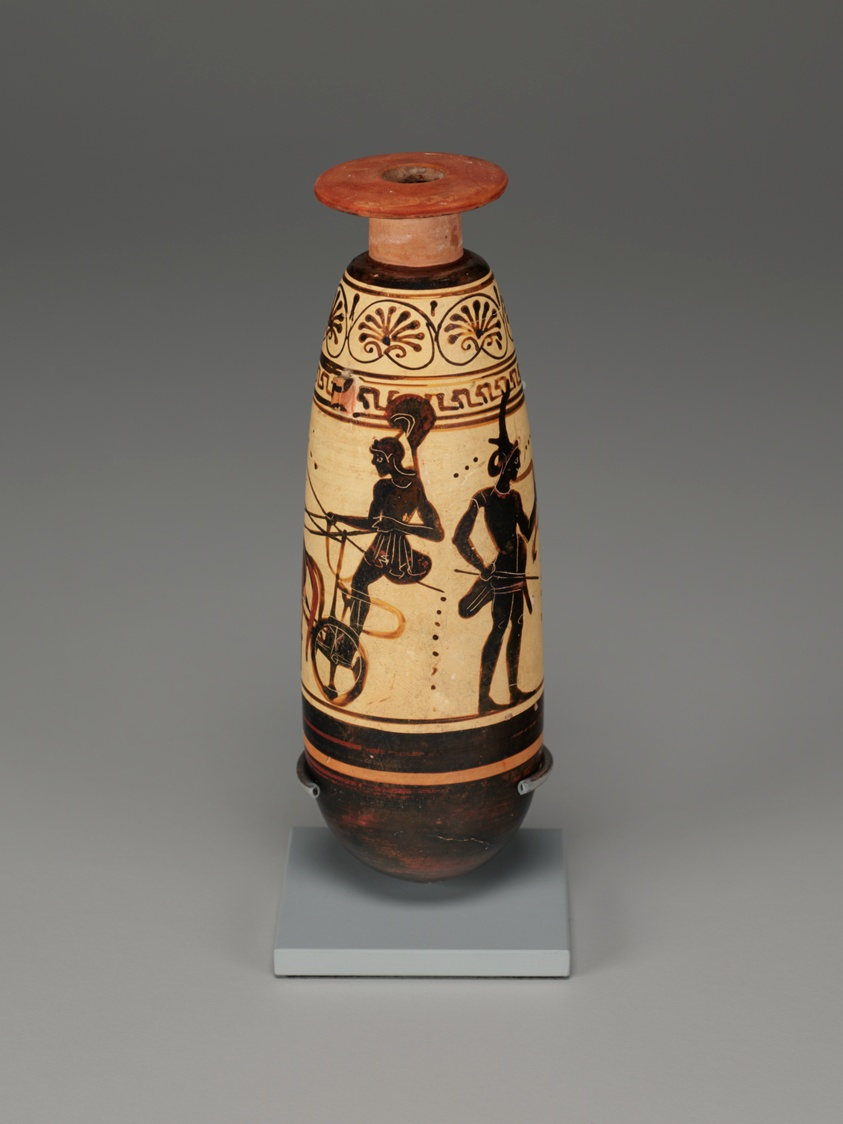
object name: Vessel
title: Alabastron (Container for Scented Oil)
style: archaic (greek), attic, ancient, greek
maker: Attributed to the Diosphos Painter; Greek; Athens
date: about 500-480 BCE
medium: terracotta, black-figure on white ground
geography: Athens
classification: vessel; ancient art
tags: mythology, beauty, rituals